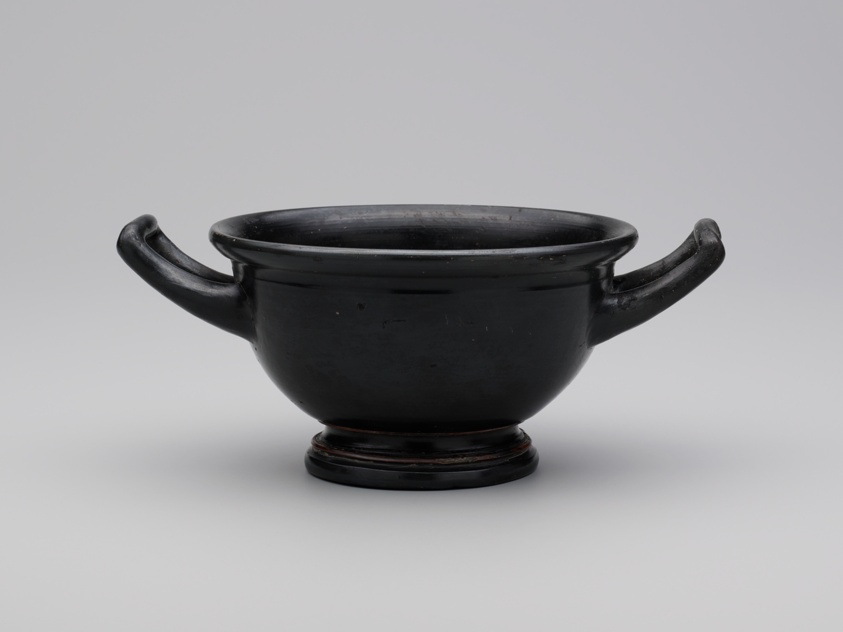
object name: Vessel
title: Skyphos (Drinking Cup)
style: greek, ancient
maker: Greek; Athens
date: 410-400 BCE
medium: terracotta, black-glaze with impressed decoration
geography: Cales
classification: drinking vessel; ceramics; vessel; ancient art